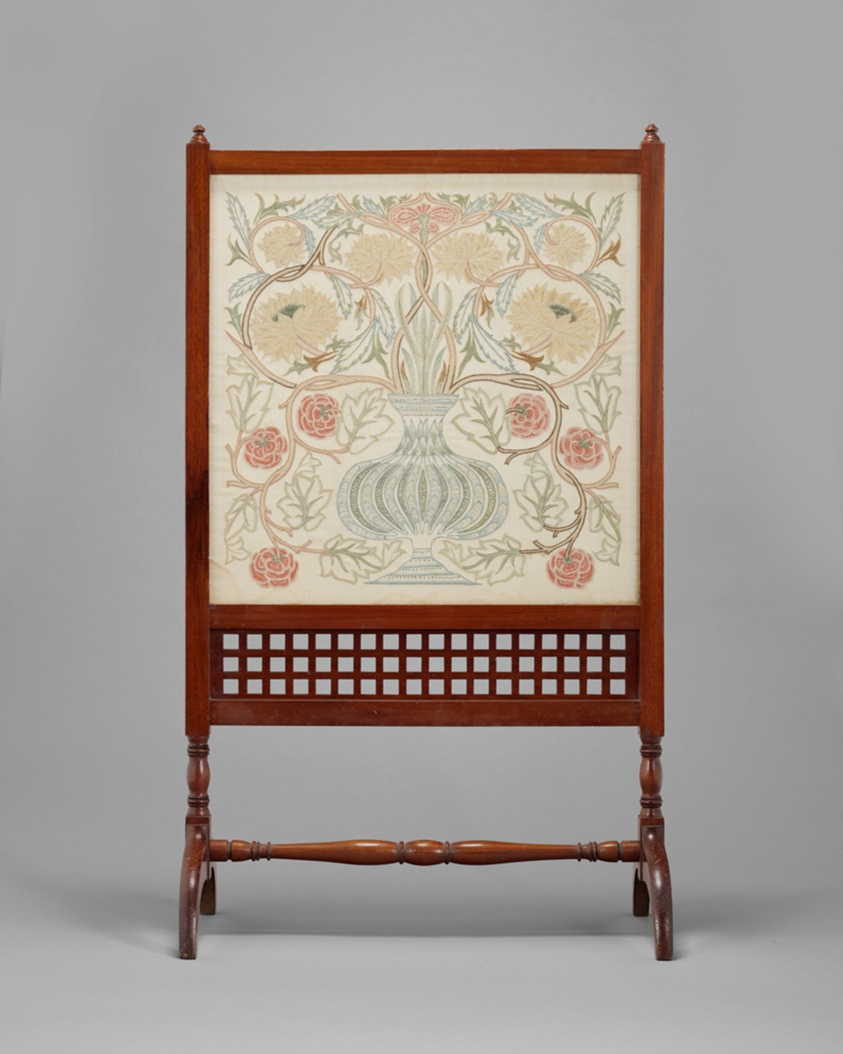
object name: Coverings and Hangings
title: Flowerpot Fire Screen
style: Arts and Crafts Movement, 19th century, british, British Arts and Crafts Movement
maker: Designed by William Morris (English, 1834-1896); Produced by Morris & Co., London (English, 1875–1940)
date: Design early 1880s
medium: Wood, cotton or linen ground, silk floss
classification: embroidery; fire screen (furniture); textile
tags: flowers, vase, foliage